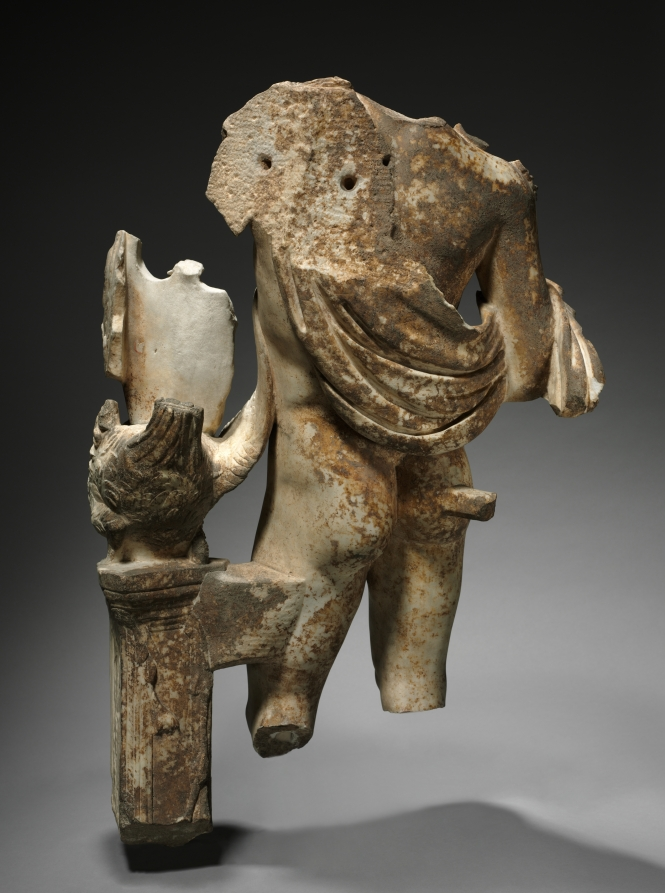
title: Torso of Apollo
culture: Italy, Roman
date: c. 100–200 CE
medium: marble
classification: Sculpture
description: This ancient statue depicts the Greek god Apollo, identified by his youthful body and the fragmentary remains of his kithara, a type of lyre (or stringed instrument) used by poets and musicians in ancient Greece. Both the kithara, decorated with griffins, and the swan upon which it rests (atop a triangular column), signify Apollo’s roles as the god of music and leader of the Muses. Beloved by the Muses for their song, swans were considered sacred to Apollo because he gave them the gift of prophecy. Swans sing a glorious song before they die, knowing they will soon return to Apollo to be reborn.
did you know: Apollo received his lyre from Hermes, who invented it.